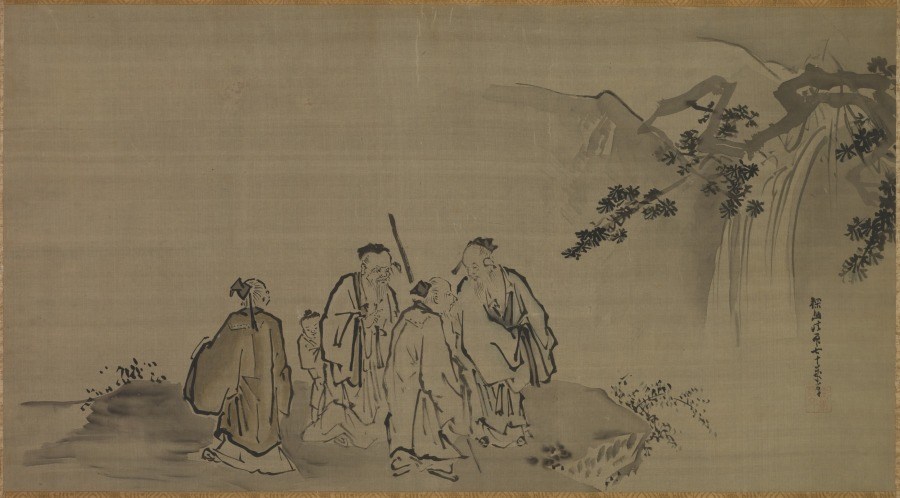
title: Chinese Sages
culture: Japan, Edo period (1615–1868)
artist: attributed to Kano Tan’yū (Japanese, 1602–1674)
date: mid- to late 1600s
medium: hanging scroll; ink and color on silk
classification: Painting